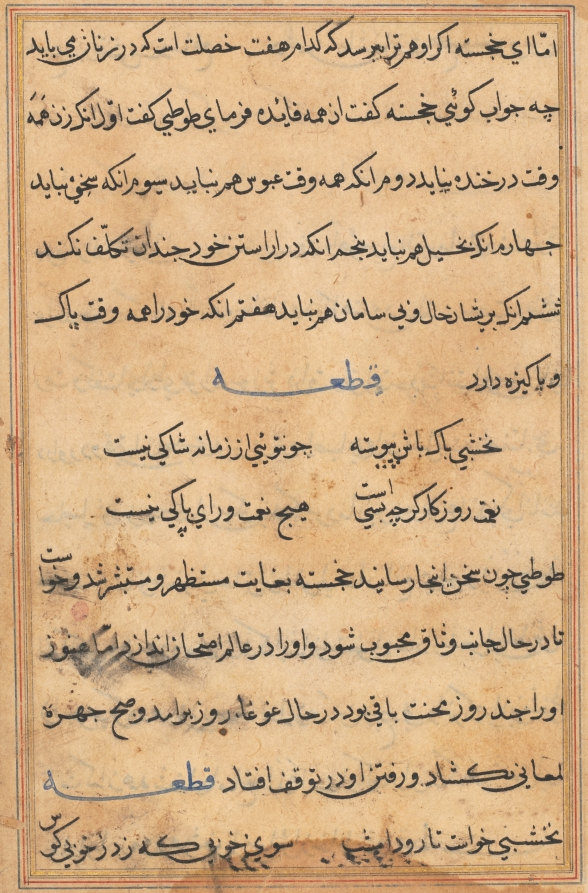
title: Page from Tales of a Parrot (Tuti-nama): text page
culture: Mughal India, court of Akbar (reigned 1556–1605)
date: c. 1560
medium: gum tempera, ink, and gold on paper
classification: Painting